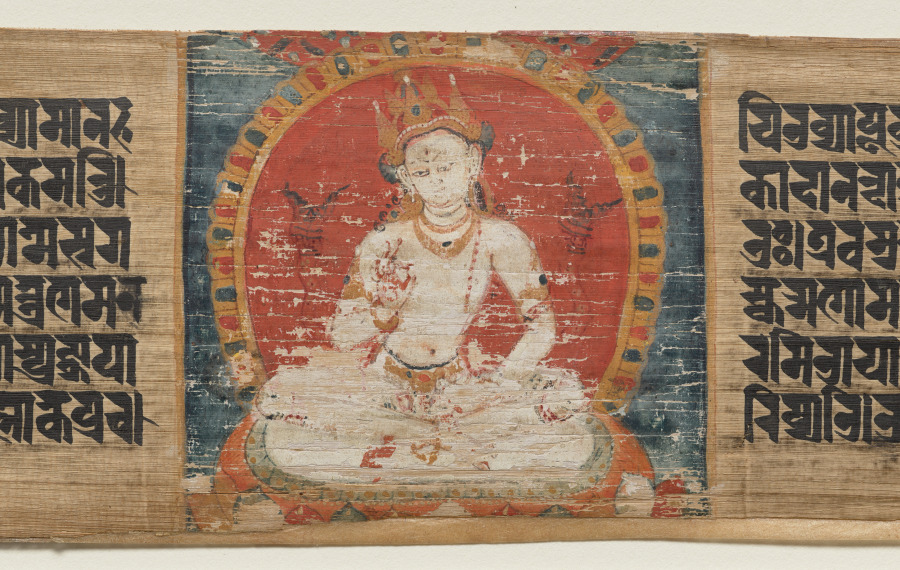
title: Prajnaparamita flanked by two bodhisattvas, folio 187 (recto), from a Manuscript of the Perfection of Wisdom in Eight Thousand Lines (Ashtasahasrika Prajnaparamita-sutra)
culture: Eastern India, Bihar, Vikramashila Monastery. Painting: Nepal, Kathmandu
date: Sunday, September 14, 1119 (year 239 of the Newar Samvat in the month of Ashvina)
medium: Gum tempera and ink on palm leaf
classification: Painting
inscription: [pravartayita]vyā deśayitavyopadeṣṭavyoddeṣṭavyā svādhyātavyā likhitavyā / tathāgatādhiṣṭhānena mahāpustake pravyaktapravyaktairakṣaraiḥ sulikhitāṃ kṛtvā satkartavyā gurukartavyā mānayitavyā pūjayitavyā arcayitavyā apacāyitavyā puṣpairdhūpairgandhairmālyairvilepanaiścūrṇaiścīvarairvādyairvastraiśchatrairdhvajairghaṇṭābhiḥ patākābhiḥ, samantācca dīpamālābhiḥ, bahuvidhābhiś ca pūjābhiḥ / iyamasmākamantikādānanda anuśāsanī / tatkasya hetoḥ? atra hi prajñāpāramitāyāṃ sarvajñajñānapariniṣpattirbhaviṣyati / tatkiṃ manyase ānanda śāstā te tathāgataḥ? ānanda āha - śāstā me bhagavan, śāstā me sugata / evamukte bhagavānāyuṣmantamānandametadavocat - śāstā te ānanda tathāgataḥ / paricarito 'smyānanda tvayā maitreṇa kāyakarmaṇā manaāpena, maitreṇa vākkarmaṇā manaāpena, maitreṇa manaḥkarmaṇā manaāpena / tasmāttarhi ānanda yathaiva tvayā mamaitarhi tiṣṭhato dhriyamāṇasya yāpayato 'smin samucchraye prema ca prasādaś ca gauravaṃ ca kṛtam, tathaiva tvayā ānanda mamātyayādasyāṃ prajñāpāramitāyāṃ kartavyam / dvir api trir api te ānanda parīndāmi anuparīndāmi enāṃ prajñāpāramitām, yatheyaṃ nāntardhīyeta, yathā nāsyāṃ tvamanyaḥ puruṣaḥ syāḥ / yāvadānanda iyaṃ prajñāpāramitā loke pracariṣyati, tāvattathāgatastiṣṭha[tīti]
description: In the center of the page is a seated goddess of wisdom, named Prajnaparamita, who personifies the content of the text itself. A red and white bodhisattva also attend her on either side. This manuscript, consisting of 188 double-sided folios, was calligraphed by a scribe at a monastery in northeastern India, commissioned by a monk from Nepal. Judging from the style of the paintings, they are the work of Nepalese artists.